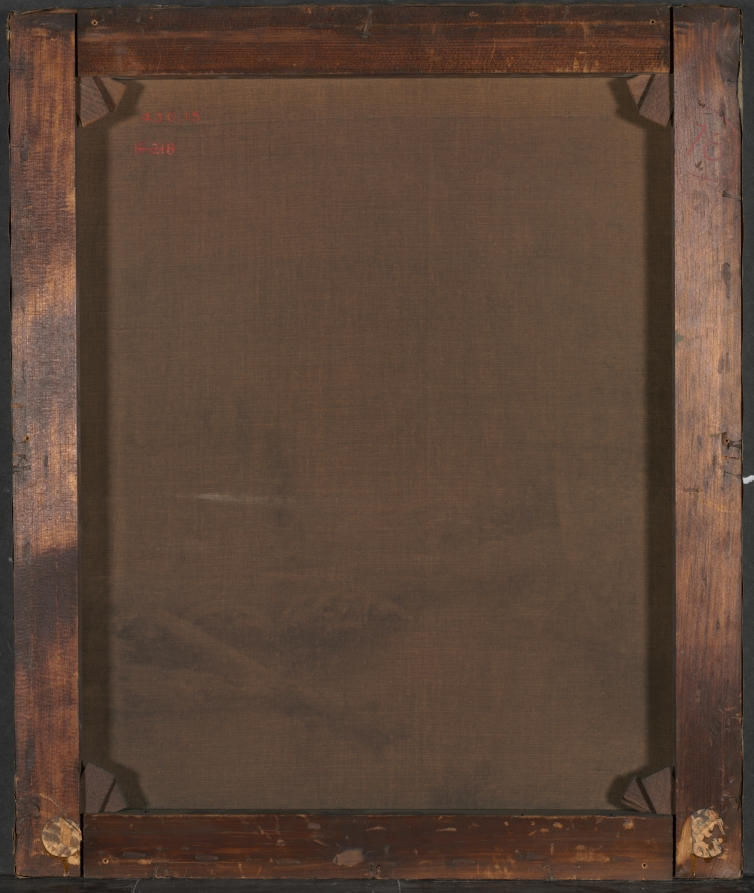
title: Autumn in the Catskills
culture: America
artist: Jervis McEntee (American, 1828–1891)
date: 1873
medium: oil on canvas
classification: Painting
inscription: Signed lower left: "JMcEntee / 1873 [J M in monogram]